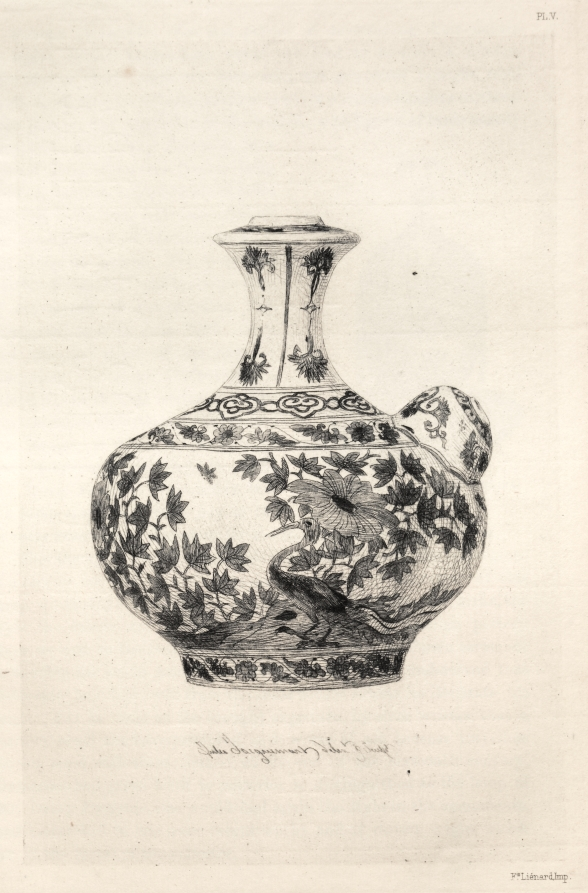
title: History of the Ceramic Art: A Descriptive and Philosophical Study of the Pottery of All Ages and All Nations: Persia: Soft Porcelain- Gargoulette, Decorated with the Simorg (Plate VI)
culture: France, 19th century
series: Book by Albert Jacquemart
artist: Jules Jacquemart (French, 1837–1880)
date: 1877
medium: etching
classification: Bound Volume